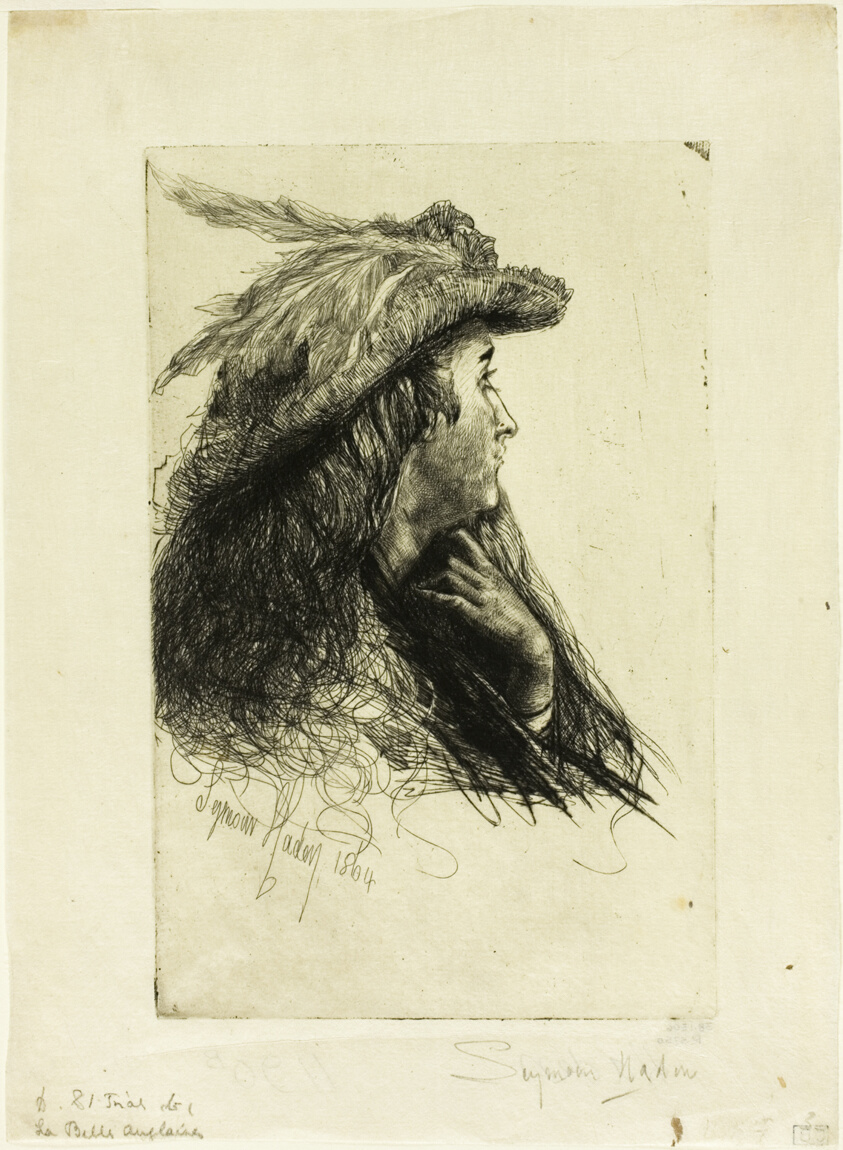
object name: Print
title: La belle anglaise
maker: Francis Seymour Haden (English, 1818-1910)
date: 1864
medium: Etching on ivory Japanese paper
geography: England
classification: etching; print; prints and drawing